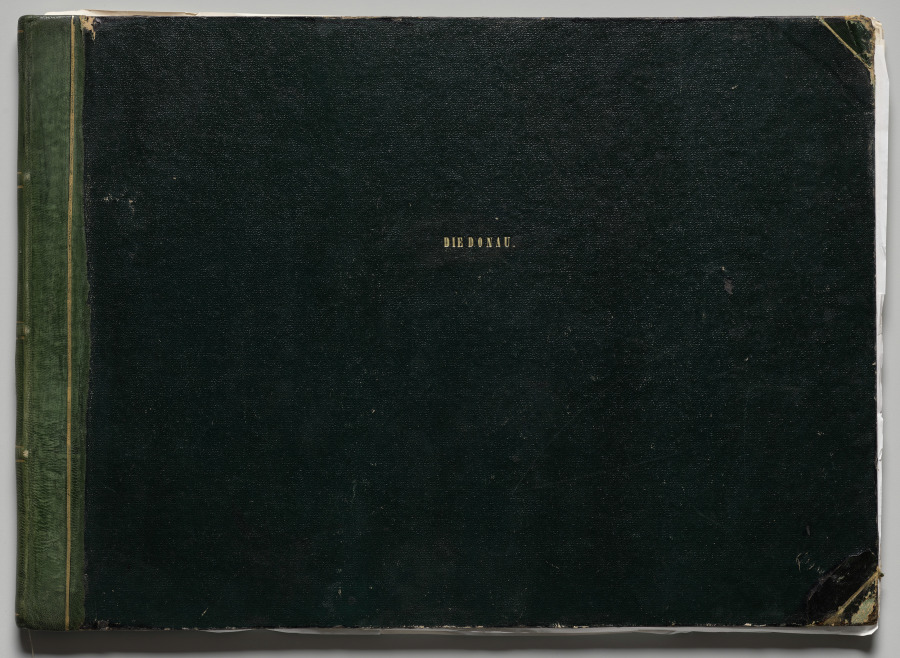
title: Nieder-oesterreich, Stadt Wien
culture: Austria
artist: Jakob Alt (Austrian, 1789–1872)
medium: lithograph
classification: Print